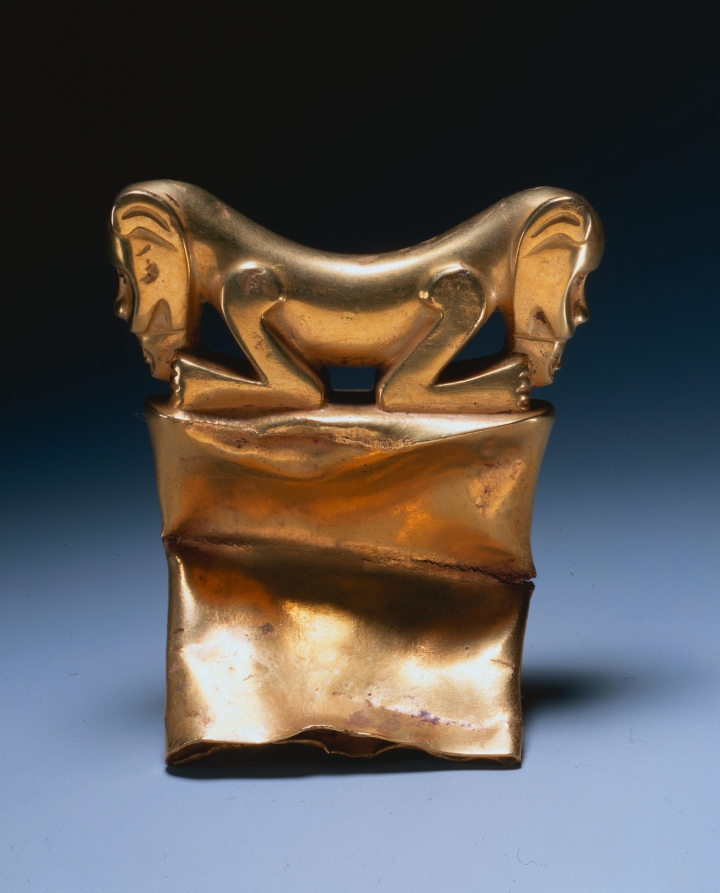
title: Staff Head(?)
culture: Colombia or Panama, International style, 5th-8th Century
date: c. 400–700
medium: cast gold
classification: Metalwork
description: The two-headed beast that crouches on the top of this object-perhaps a staff finial (head)-holds a human head or perhaps a mask between its paws. The silken surface and simple, elegant design identify the finial as of the International style, so-called because it crossed ancient boundaries and is found in Colombia as well as Costa Rica and Panama.